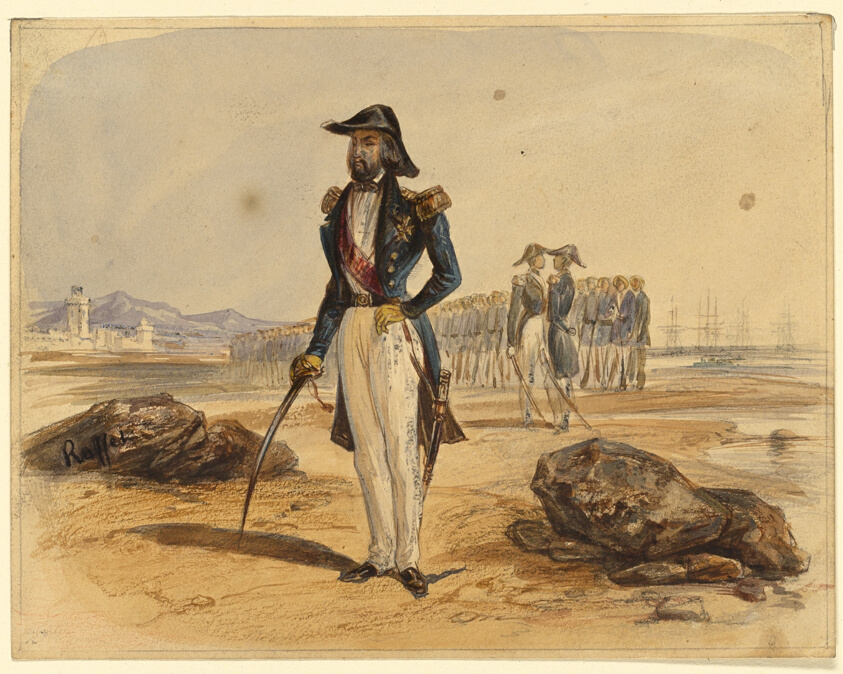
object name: Drawing and Watercolor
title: General with Troops in Background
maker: Denis Auguste Marie Raffet (French, 1804-1860)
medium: Watercolor, heightened with lead white, over graphite, selectively varnished with gum arabic, on cream wove paper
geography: France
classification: watercolor; drawings (visual works); prints and drawing